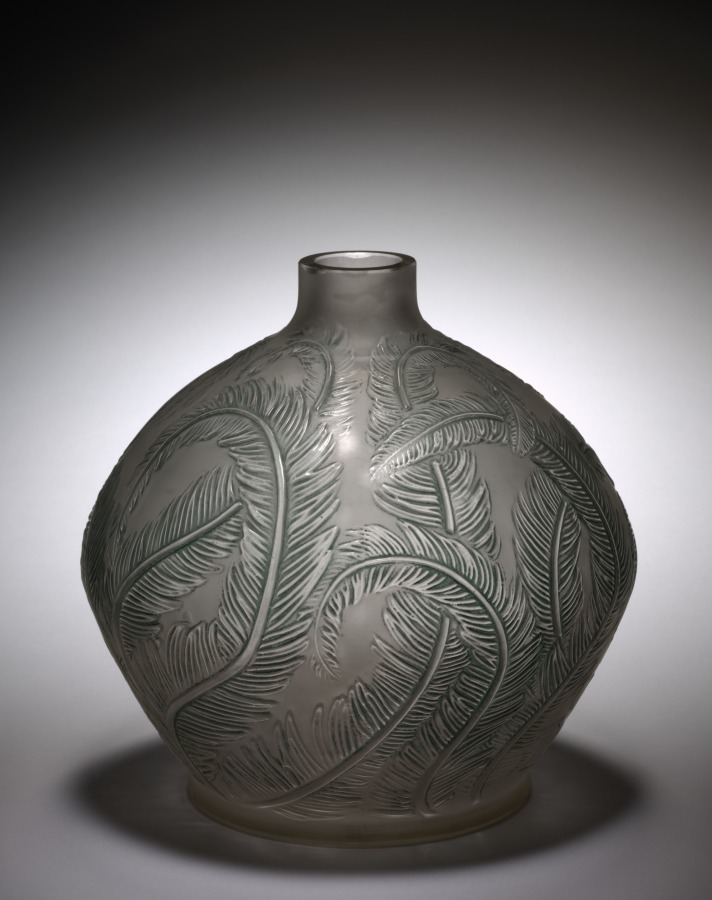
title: Vase: Plumes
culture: France, 20th century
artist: René Lalique (French, 1860–1945)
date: 1920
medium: glass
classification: Glass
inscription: signed: Lalique.